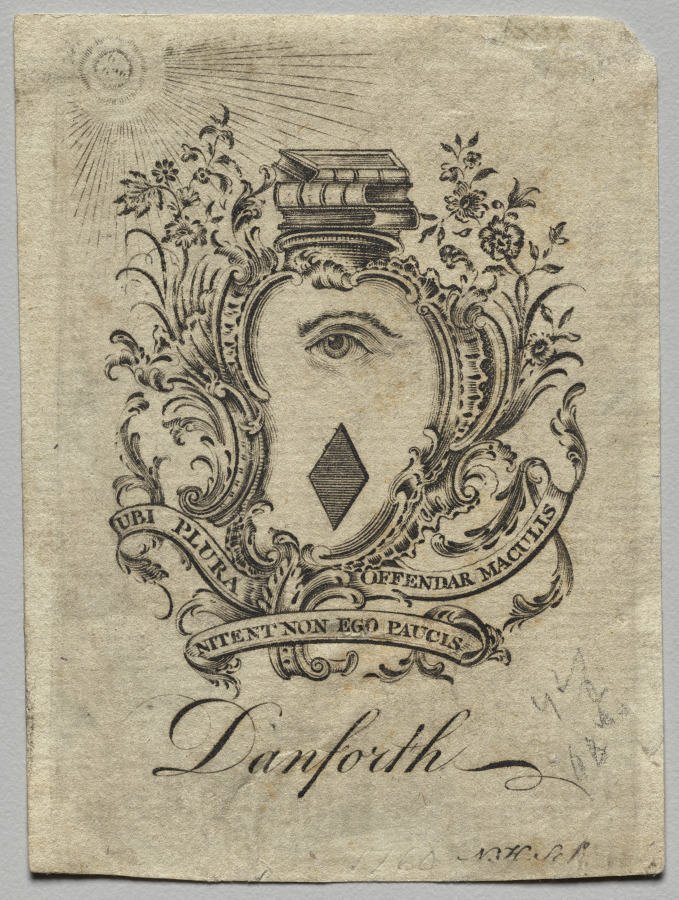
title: Bookplate: Coat of Arms with Danforth inscribed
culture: America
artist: Nathaniel Hurd (American, 1730–1778)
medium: engraving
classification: Print